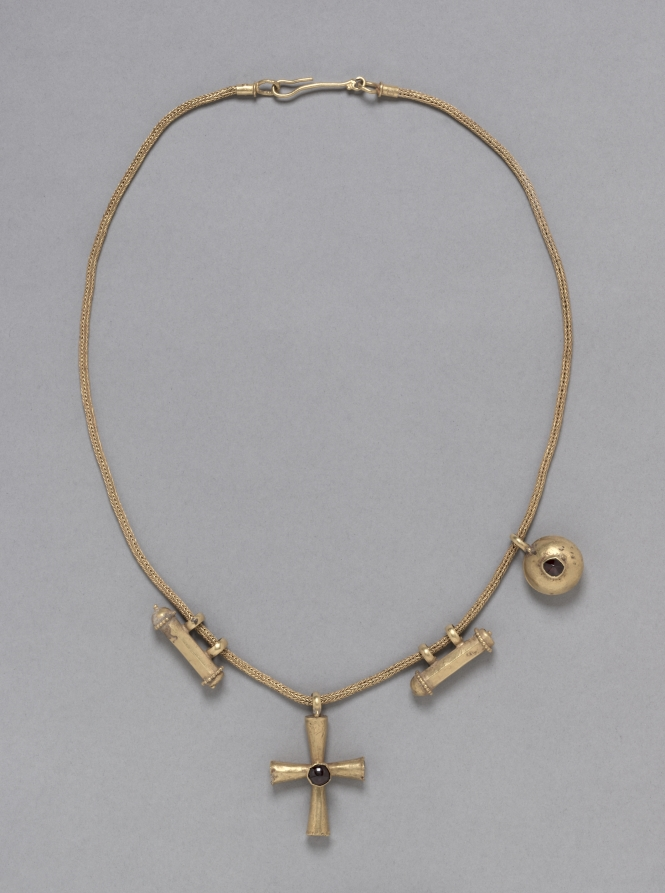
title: Necklace with Pendants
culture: Byzantium, Constantinople?, early Byzantine period, 6th century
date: 500s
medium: gold, garnets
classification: Metalwork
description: Wearing richly decorated gold necklaces such as this one was a common practice among members of Byzantium’s upper classes. In addition to their use as personal adornments and symbols of social status, necklaces with cross pendants and capsules containing relics were also believed to function as powerful protective devices. Here, two hexagonal gold cylinders that may have enclosed either magical texts or holy substances flank a cross pendant on either side.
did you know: Just as some of us wear jewelry associated with our particular faith, the original owner of this necklace proudly wore this cross a symbol of their Christian beliefs.